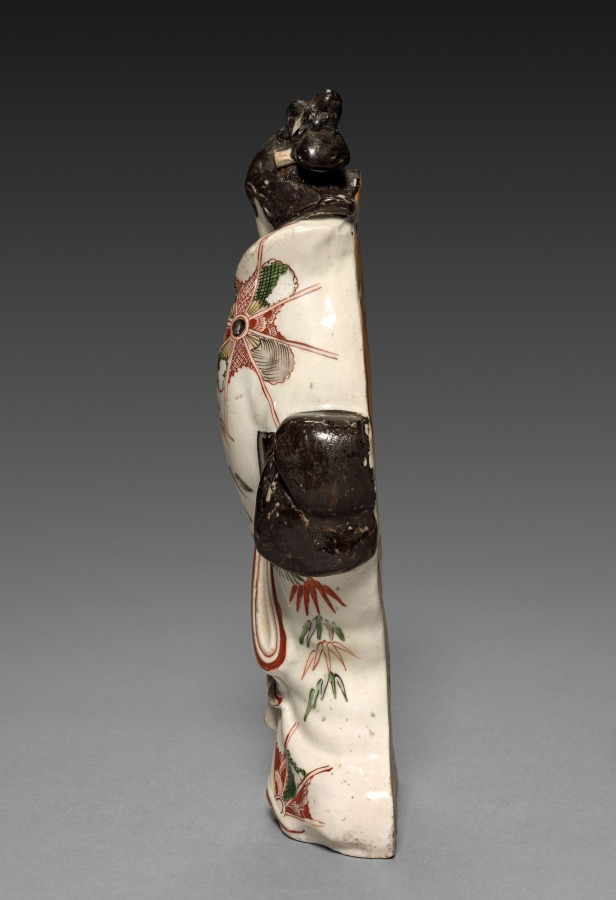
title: Standing Figure of a Beauty: Arita Ware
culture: Japan, Edo period (1615–1868)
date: 1600s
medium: porcelain with overglaze enamel decoration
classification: Ceramic